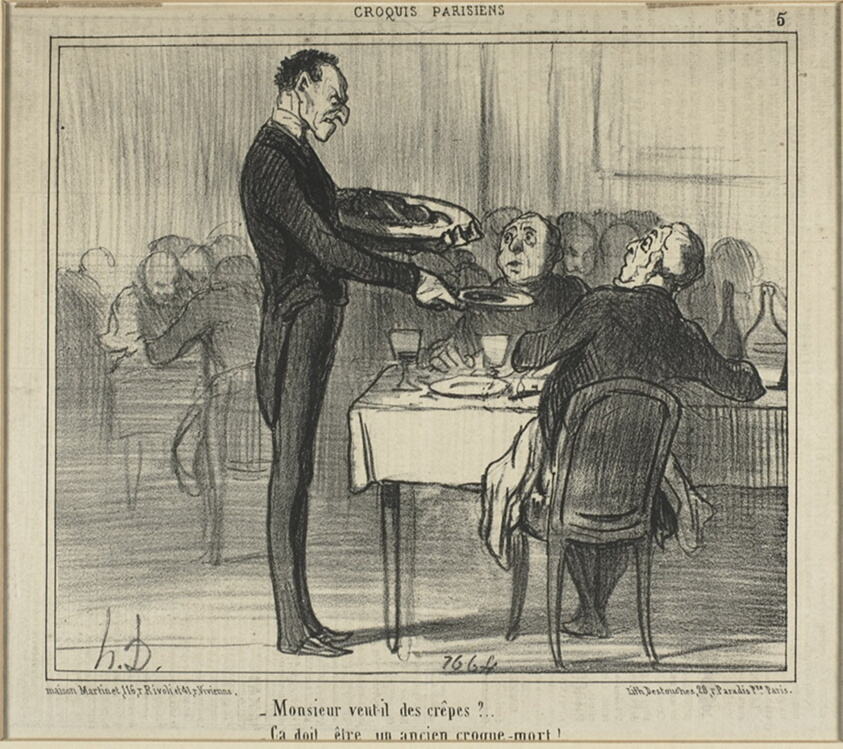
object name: Print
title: "Would Monsieur like some crêpes?.. - He must have been an undertaker," plate five from Croquis Parisiens (Parisian Sketches)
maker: Honoré Victorin Daumier (French, 1808-1879); published by Le Charivari (French, 1832-1915)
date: published May 9, 1855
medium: Lithograph on cream wove paper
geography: France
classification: prints and drawing; newsprint; lithograph; print